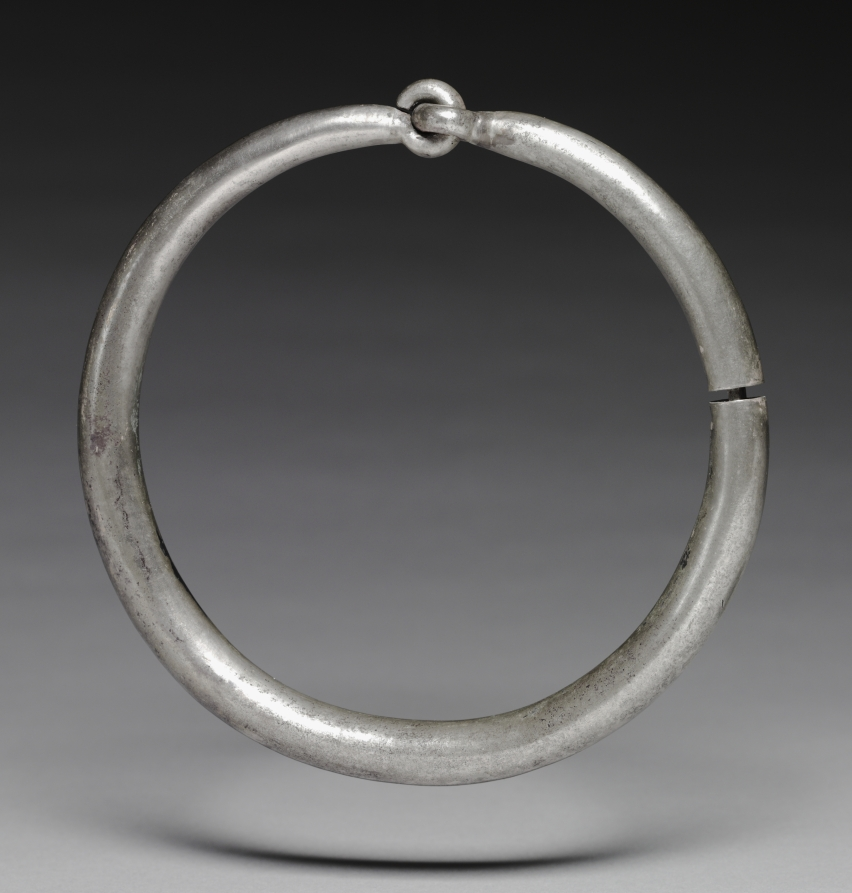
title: Torque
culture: Greece, late Hellenistic period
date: 200–1 BCE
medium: silver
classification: Metalwork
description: This torque, a type of necklace, is part of a set of jewelry including a bracelet of similar design (1986.182). Torques like this one were popular amongst the non-Greek speaking peoples of the ancient world, including the Scythians, Thracians, Persians, and many others. Though most torques are simple open-loop rings, this one was made with a hinge so that the wearer could open it to put it around their neck.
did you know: This torque is made from a single sheet of silver rolled into a tube and soldered lengthwise, then bent into a ring.